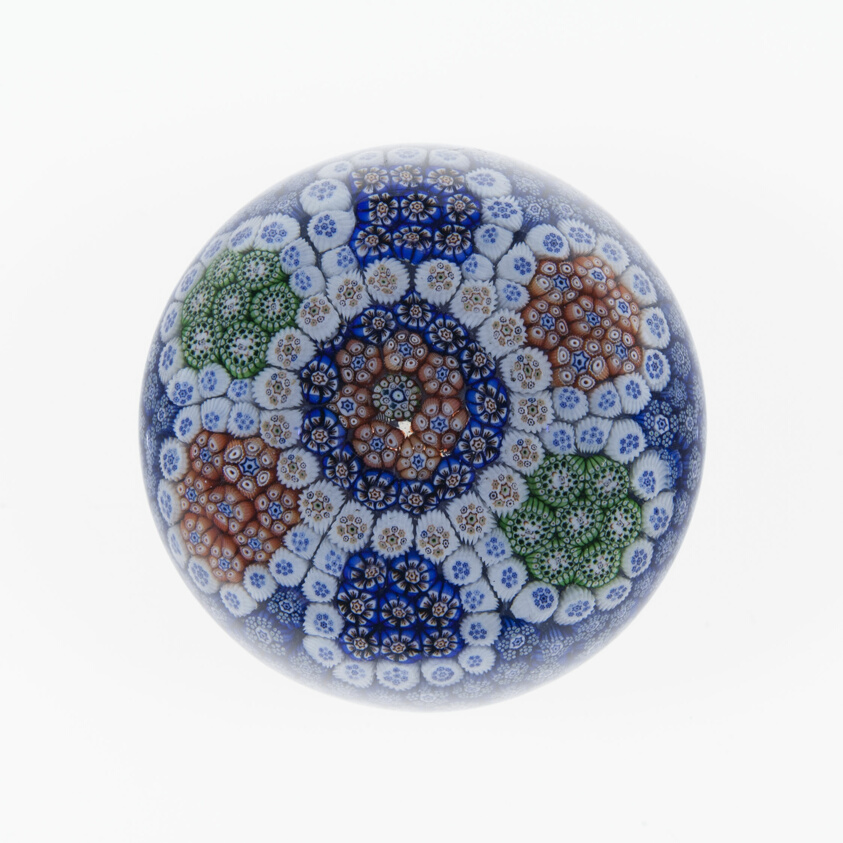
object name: Glass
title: Paperweight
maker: Baccarat Glassworks (Cristalleries de Baccarat); Lorraine, France, founded 1764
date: 19th century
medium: Glass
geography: Lunéville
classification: paperweight; millefiori; european decorative arts; glass